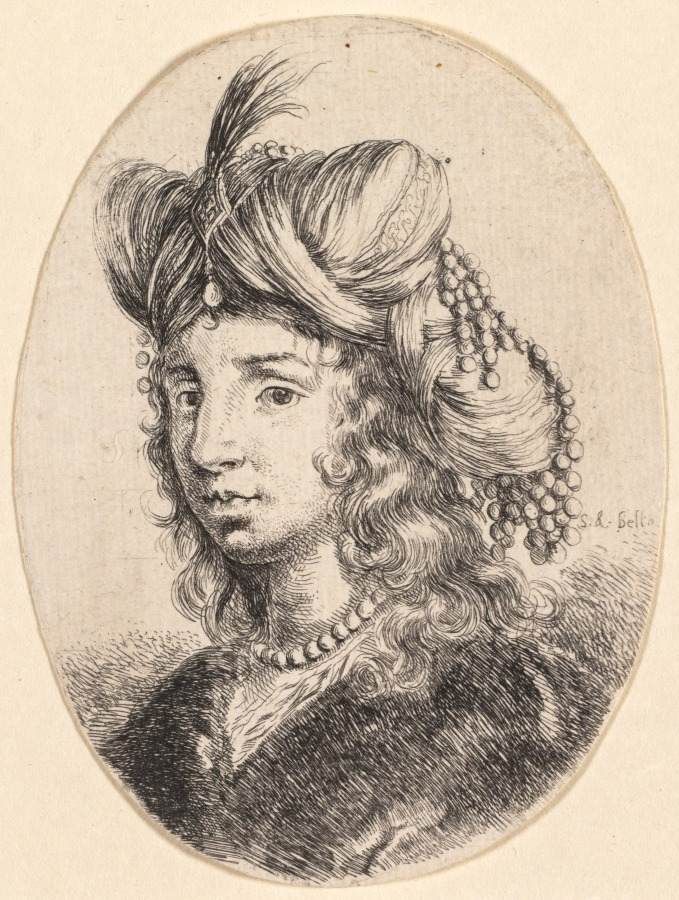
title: Several heads in the Persian style: Portrait, Sultana Wearing a Pearl Necklace and a Turban (Plusieurs têtes coiffées à la persienne)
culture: Italy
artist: Stefano Della Bella (Italian, 1610–1664)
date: 1649–50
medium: etching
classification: Print